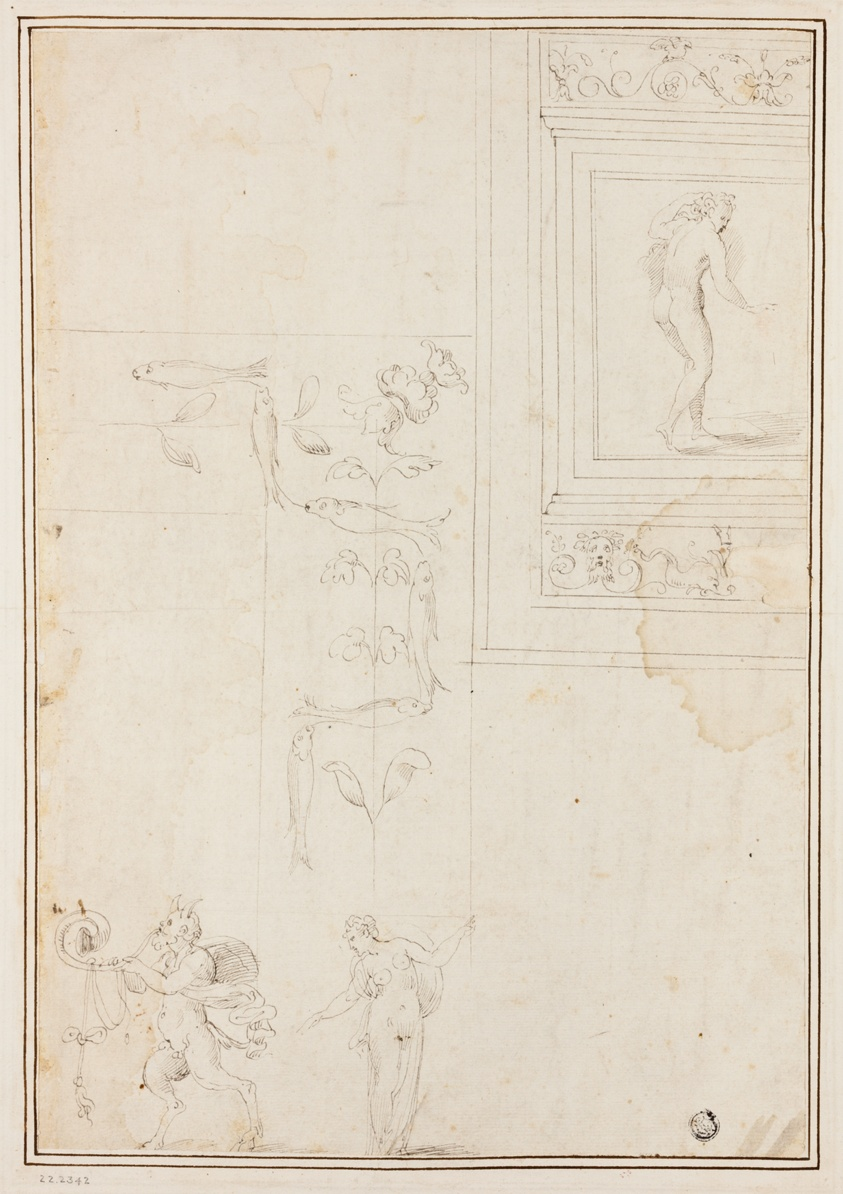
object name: Drawing and Watercolor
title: Ceiling Design, with Sketches of Ornamental Border, Helmeted Head (recto); Sketches of Ornamental Details (verso)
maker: School of Giovanni da Udine, called Giovanni dei Ricamatori (Italian, 1487-1561); or School of Perino del Vaga (Italian, 1500/01-1547)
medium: Pen and brown ink, with touches of graphite, on ivory laid paper, edge mounted on to ivory laid paper (recto), and pen and brown ink on ivory laid paper (verso)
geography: Italy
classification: pen and ink drawings; drawings (visual works); prints and drawing